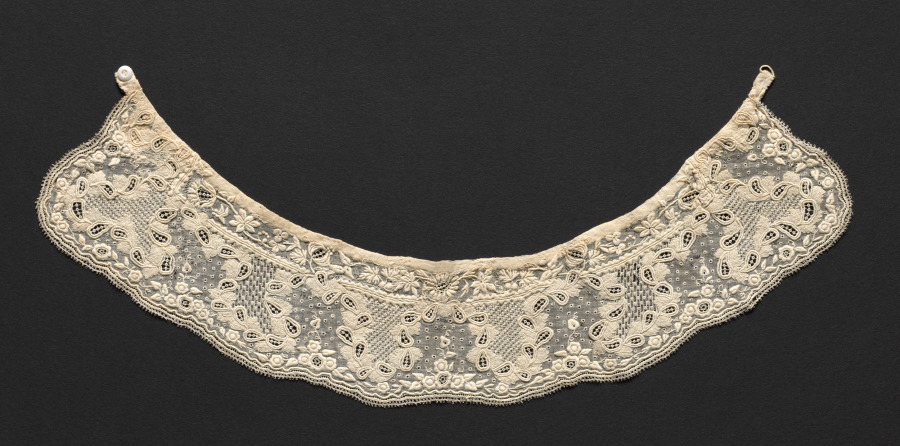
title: Lace Collar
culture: France or Switzerland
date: 1800s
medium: Plain weave cotton: needle lace (drawnwork) and embroidery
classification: Embroidery